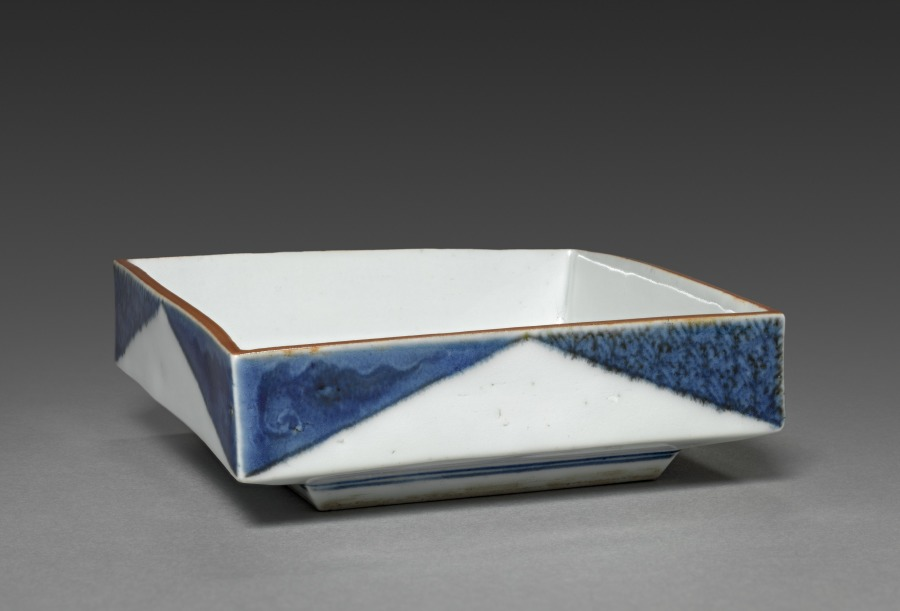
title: Side-Dish with Dandelion in Rocks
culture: Japan, Edo period (1615–1868)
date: 1700s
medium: One of a set of five dishes; porcelain with underglaze blue and overglaze iron oxide (Arita ware, Kutani style)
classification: Ceramic